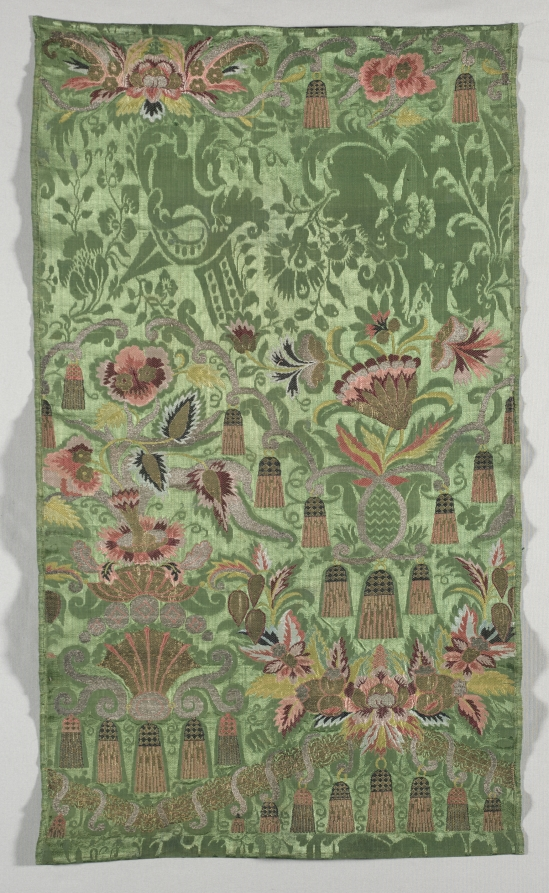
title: Length of Silk Brocade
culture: Italy, early 18th century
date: early 1700s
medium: brocade, silk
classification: Textile